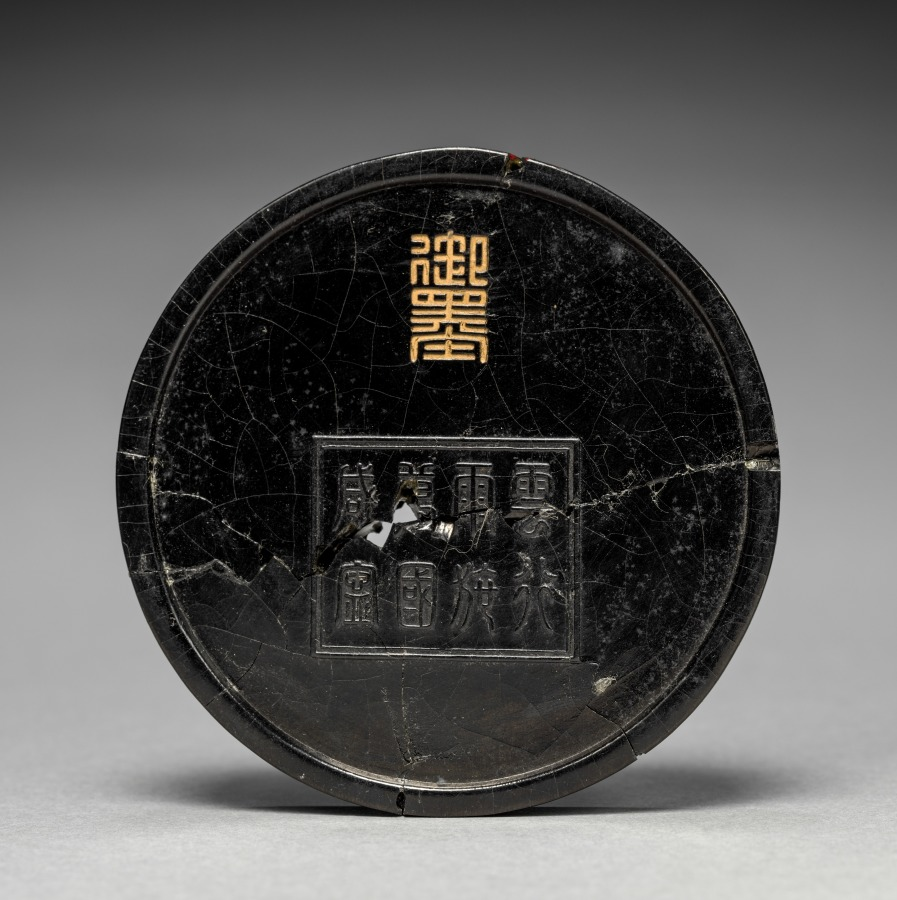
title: Ink Cake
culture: China, Ming dynasty (1368–1644)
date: 1368–1644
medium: ink cake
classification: Miscellaneous